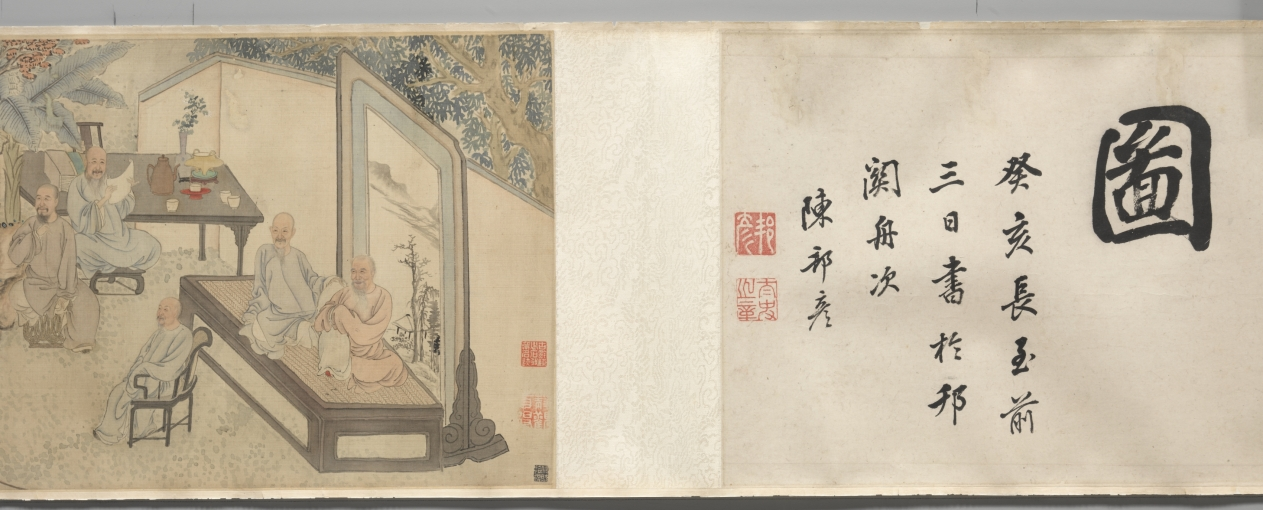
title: The Ninth Day Literary Gathering at Xing’an [Temporary Retreat]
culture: China, Qing dynasty (1644-1911)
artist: Fang Shishu (Chinese, 1693–1751)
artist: and Ye Fanglin (Chinese, active late 1600s–mid-1700s)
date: 1743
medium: Handscroll; ink and color on silk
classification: Painting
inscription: Fang Shishu's seal at beginning of painting: Ou ran shi de 偶然拾得. Ye Fanglin's seal at end of painting: Fanglin 芳林. Frontispiece title dated 1743 and 3 seals of Chen Bangyan 陳邦彦 (1678-1752).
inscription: 行庵在揚州北郭天寧寺西隅，馬君嶰谷半槎兄弟購僧房隙地所築，以為游息之處也。寺為晉謝太傅別墅。西隅饒古木，䨴鬱陰森，入林最僻，不知其近郛郭。庵居其中，無斲礱髤采之飾，惟軒庭多得清蔭，來憩者每流連而不能去。乾隆癸亥九日，積雨既收，風日清美，遂約同人，咸集於斯，中縣［懸］仇英白描陶靖節像，采黃花，酌白醪為供，乃以人世難逢開口笑，菊花雖插滿頭歸分韻賦詩。陶陶衎衎，觴詠竟日。既逾月，吳中寫真葉君敬［震］初適來，群貌小像，合為一卷，方君環山補景，命曰九日行庵文讌圖。裝池成，將各書所作於後，而囑鶚為之記。記按圖中共坐短榻者二人：右箕踞者，為武陵胡復齋先生期恆；左抱膝者，為天門唐南軒先生建中也。坐繩床者二人：中手牋者，歙方環山士庶；左仰首如欲語者，江都閔玉井華也。一人坐藤塾捻髭者，鄞全謝山祖望也。一人倚石坐若凝思者，臨潼張漁川四科也。樹下二人：離立把菊者，錢唐厲樊榭鶚；袖手者，錢唐陳竹町章也。一人憑石床坐撫琴者，江都程香溪先生夢星也。聽者三人：一人垂袖立者，祁門馬半查曰璐；二人坐瓷塾，左倚樹、右跂腳者，歙方西疇士疌 、汪恬齋玉樞也。二人對坐展卷者，左祁門馬嶰谷曰琯，右吳江王梅沂藻也。一人觀者，負手立於右，江都陸南圻鐘輝也。從後相倚觀者一人，歙洪曲溪振珂也。童子種菊者三人：樹間侍立者一人，撰杖、執卷者各一人。其植有蕉、有竹，又有雜樹，作丹黃青碧之色，紀時也。夫重九佳名，舉俗所重，而高常侍歎獨坐而搔首，陸天隨感登高以剫門，無其時地與人耳。今吾儕幸生太平，遇勝地，又皆素心有文之侶，固人世不可多得之會；而此十六人者，或土斷，或客游，聚散不常。異日者，歲月遷流，撫節物以有懷，一披此圖，悅如晤對。將來覽者，或亦不異此意乎。甲子夏五十有四日厲鴞記並書。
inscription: 揚州為江北大都會，居民連甍接楹，笙歌輿從，竟日喧聚，其於淸歌雅集，葢罕矣。城北天寧寺，為晉謝公駐節時所游息，其中有行庵，吾友馬君嶰谷、半查兄弟之小築也。地不踰五畝，而老樹古藤，森蔚相望，皆千百年物，間以修竹，春鳥秋蟲，更唱迭和，其間曲廊高榭，位置閑適。出門未數百步，即黃塵濁流極目，令人作惡。而此中獨蕭然有人外之思。乾隆八年九日，嶰谷兄弟招集同社一十四人祀陶公，出所藏仇實父白描像懸於閣上，各賦一詩。予方留滯西泠，未得預也。又踰旬而予至，諸君方擬繪圖記事，嶰谷曰：是不可無君。乃以展日更舉，令予得陪卷軸之末；而洪君曲溪，兩度皆以病失約，然故吟社中人也，亦補入焉。予太息謂諸君曰：謝公之風流，千古如在；然其游息於斯也，則與東山賓從之樂稍不同矣。公之為是行也，蓋以符氏之亂，思北定中原也。而其時公巳困於讒口，不自安於朝；雖在河朔極有可乘之會，而神明內索，徘徊不克自前。老師左次，竟無尺寸之功，坐失事幾。吾常過邵伯之埭，吊法雲之荒祠，未嘗不喟然累啼，以為明德之衰也。至若九日嘉名，陶公高格，固在羲皇懷葛之間；然而讀其 止酒之詩，蒼梧漢水之感，以瘦詞寄其孤憤則夫黃花白酒，蓋亦不得巳而漫與焉者。今吾輩生逢太平之日，書淫墨癖，是處留連，胸次中了無一事，為江湖之幸民，論人雖甚媿，論其時與地，則不可不私相慶也。諸君曰：善。圖之詳巳見於厲君樊榭記中。予之許為嶰谷兄弟序斯圖也，三年於茲；今夏重披圖捉筆，而唐丈南軒，巳化為異物矣。對酒當歌，人生幾何，願與諸君並日相遇從焉。丙寅夏杪孤山社小泉翁全祖望序。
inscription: 6 additional colophons and 15 additional seals: 1 colophon, dated 1746, and 1 seal of Huang Zhijun 黃之雋 (1668-after 1746); 1 colophon and 2 seals of Zha Xiang 查祥 (1718 jinshi); 1 colophon, dated 1746, and 3 seals of Zhang Siwen 張思問; 1 colophon, dated 1748, and 4 seals of Shao Dong 卲東 (1721 jinshi); 1 colophon, dated 1753, and 2 seals of Fang Shiju 方世舉 (signing as Fang Funan 方扶南); 1 colophon, dated 1808, of Ruan Yuan 阮元 (1764–1849); 3 seals unidentified.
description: By the 1700s, Yangzhou was flourishing both economically and culturally as the most prosperous city in China, having surpassed all other Jiangnan cities in their creation of gardens. This group portrait commemorates a literary gathering in the private garden of the salt merchants and art patrons Ma Yueguan (1688–1755) and his brother Ma Yuelu (1697–after 1766) in Yangzhou. Ma Yueguan received imperial recognition for providing financial aid and food relief for those affected by flood and drought. Ma Yueguan is seen seated at the end of the painting holding an open scroll while Ma Yuelu stands behind the qin instrument player. Among the guests were officials, scholars, poets, painters, and merchants, a mix of local members of a poetry club reflecting increasing social diversity.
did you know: The two hosts and their fourteen guests were all officials, scholars, poets, painters, and salt merchants.